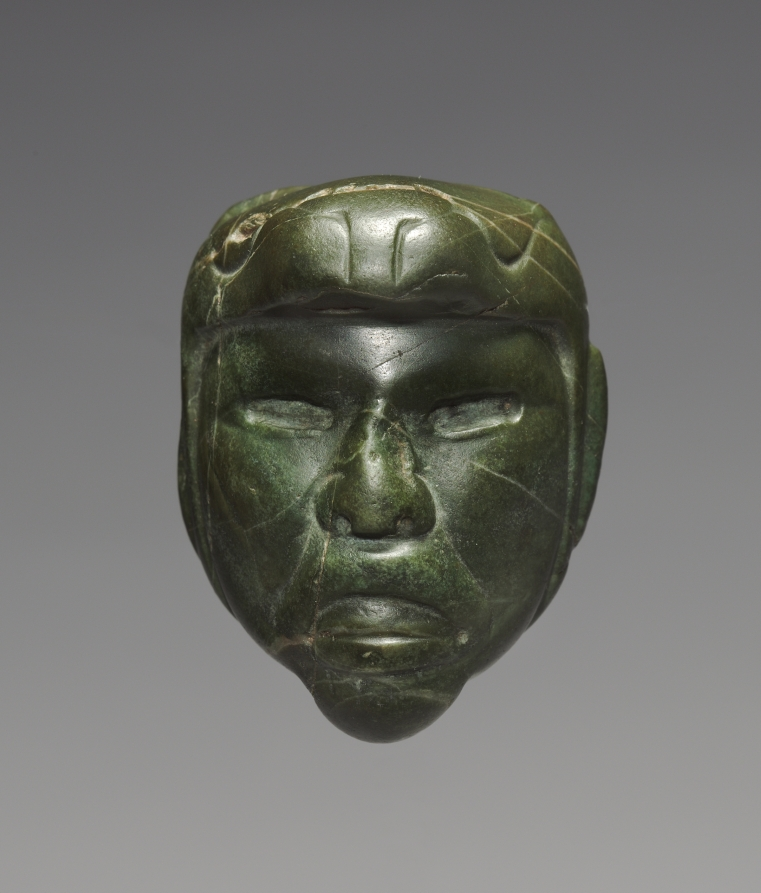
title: Head with Animal Headdress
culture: Mexico, Puebla, Matamoros region(?), Olmec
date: 900–300 BCE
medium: serpentine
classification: Sculpture